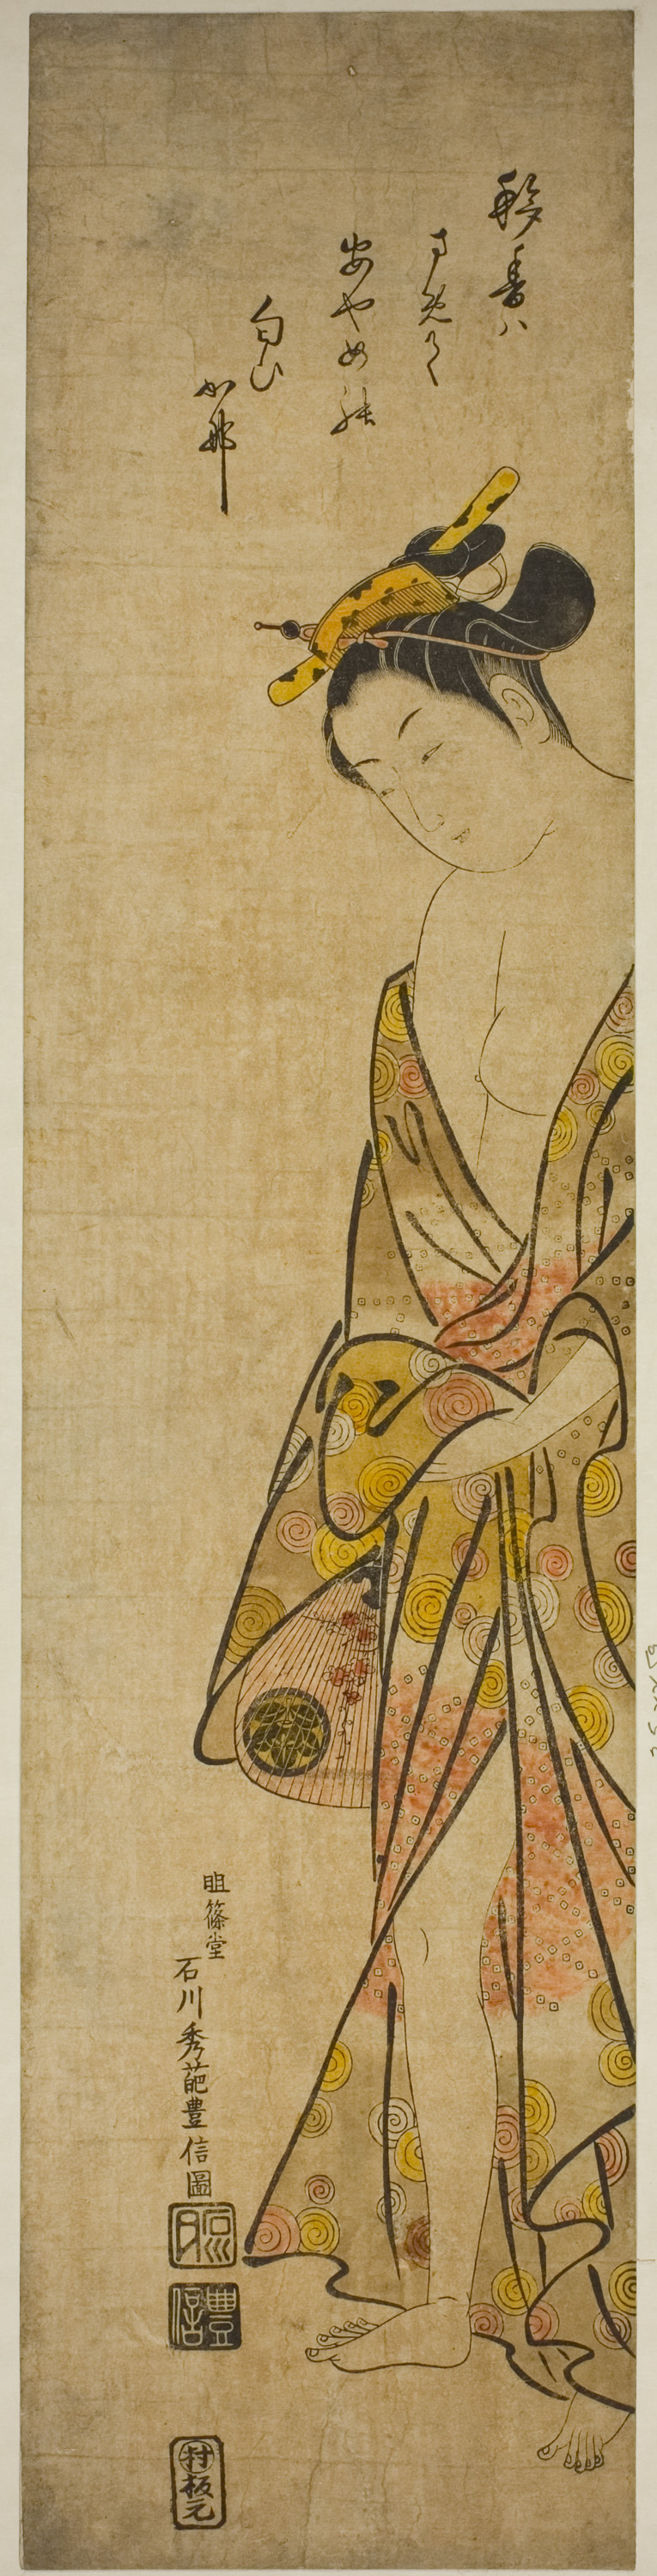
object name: Print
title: Young Woman after a Bath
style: Japanese (culture or style)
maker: Ishikawa Toyonobu (Japanese, 1711-1785)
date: c. 1745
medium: Hand-colored woodblock print; wide hashira-e, beni-e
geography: Japan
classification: woodblock print; print; asian art